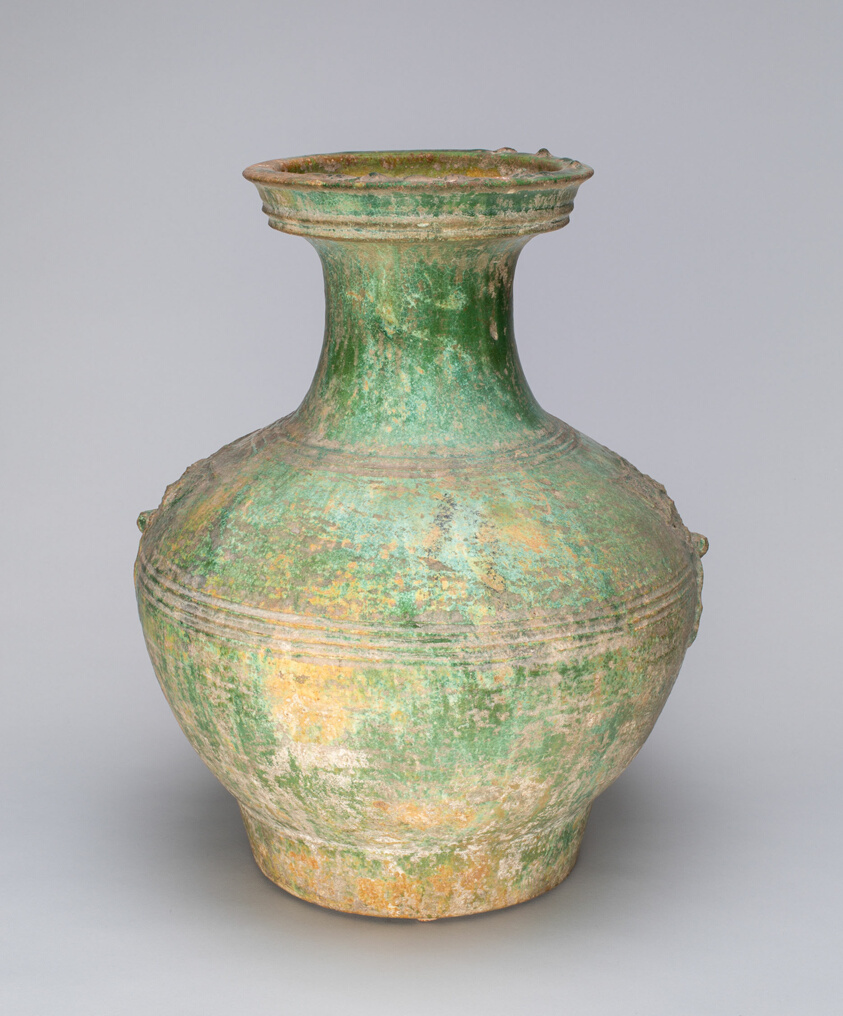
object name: Vessel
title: Globular Jar with Mock Ogre Mask Ring Handles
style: Chinese (culture or style)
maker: China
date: Han dynasty (206 B.C.–A.D. 220)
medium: Earthenware with underglaze molded decoration and lead green glaze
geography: China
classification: earthenware; asian art; ceramics; vessel